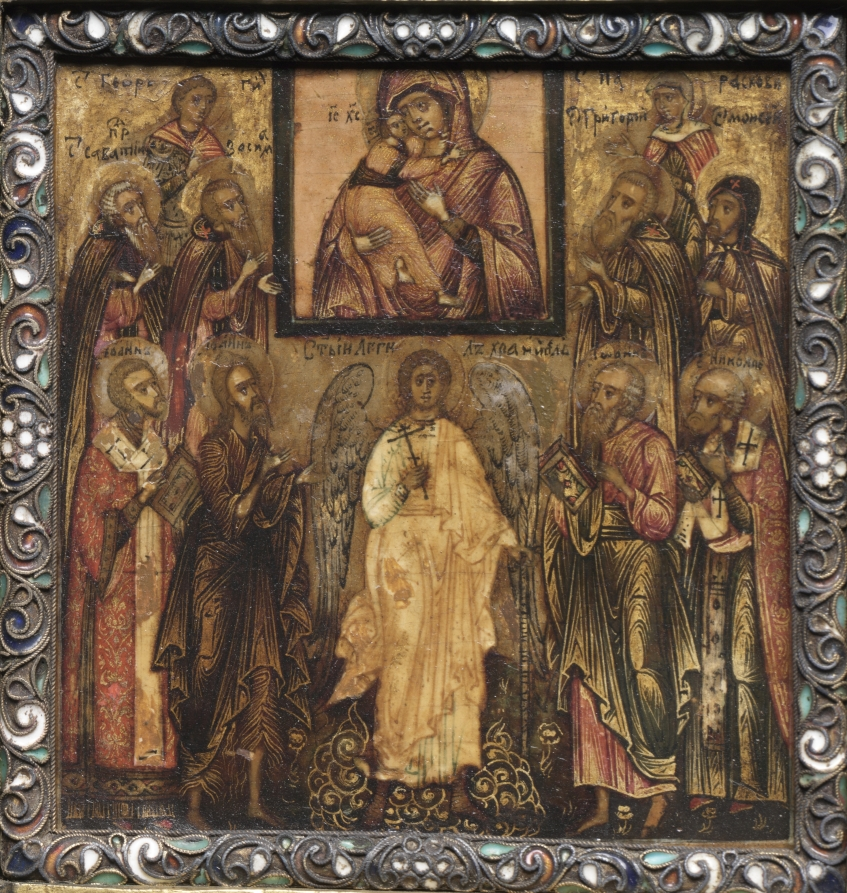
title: Portable Triptych Icon: Adoration of the Miracle-Working Icon of the Vladimir Mother of God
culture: Byzantium, Russia, Moscow?, Byzantine period, 17th century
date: 1600s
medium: painted wood panel within enameled brass frame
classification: Painting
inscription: Inscribed throughout in traditional Church Russian (Church Slavonic) with names of prophets, saints, etc. Engraved on the outside of the brass frame is a cross with the symbols of the Passion, inscribed (top to bottom): The King of Glory; Jesus Christ; Victor; Lance (with which Christ was speared); Stick (tipped with acid to aggravate the wound); the initials R, B, M, L, G, G, standing for various personages represented in the paintings; and at the lower center, the Russian letters GA ("Golova Adama": Head of Adam). A scrap of paper was found behind the center panel, but it is damaged and very difficult to read. Professor A. Dean McKenzie of the University of Oregon, who translated the numerous inscriptions and identified the iconography of the panels, likewise examined the writing on the paper scrap and in a letter of January 29, 1979, said that it refers to two brothers: Ivan Dmitrievich, one of the brothers, apparently presented this icon as a gift to his younger brother.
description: This is part of a triptych icon and was probably commissioned by a lay person for private prayer and meditation. It could be folded and shut when not in use. The scene represented is the Adoration of the Miracle-Working Icon of the Vladimir Mother of God. Small portable icons such as this were common to later Russian religious practice.